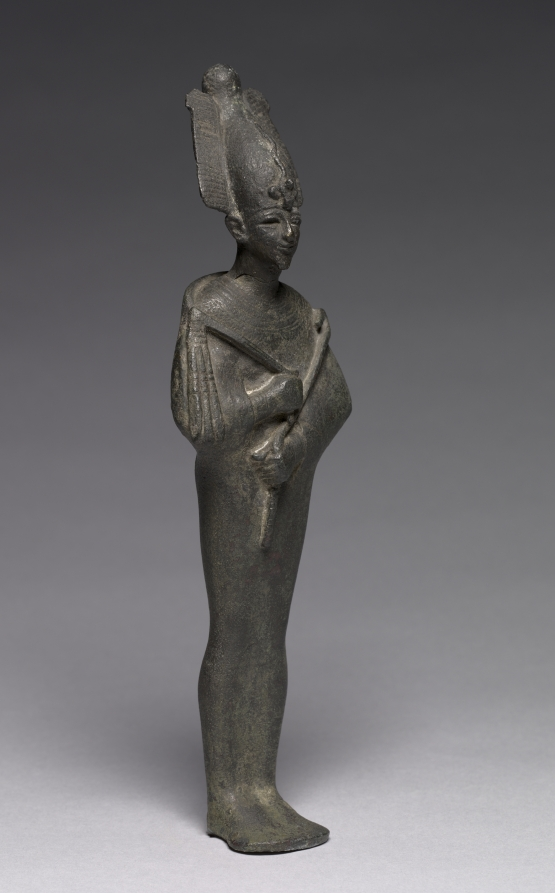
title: Statuette of Osiris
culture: Egypt, Late period (715–332 BCE), Dynasty 26 or later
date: 664–30 BCE OR 664–330 BCE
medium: bronze, body solid cast, head hollow cast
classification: Sculpture